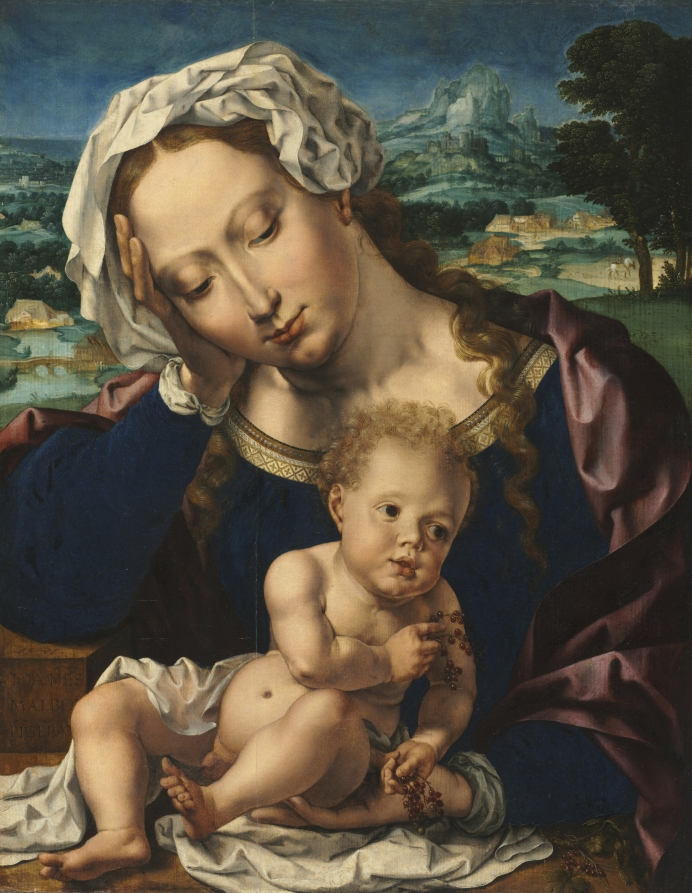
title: Virgin and Child in a Landscape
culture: Flanders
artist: Jan Gossaert (Flemish, c. 1475/78–1532)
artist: and an Anonymous Landscape Painter (Flemish)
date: 1531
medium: oil on wood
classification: Painting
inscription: Signed lower left: "1531 / JOANES / MALBO [...] / PÏGEBAT"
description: Among the first northern European artists to study in Rome, Gossaert returned north to serve in various German and Flemish courts, incorporating Italian Renaissance ideas. Gossaert also painted the frame, including the Latin inscription: "Mother, may your contemplation be our reconciliation." The patron is likely Mencía de Mendoza, a Spanish noblewoman, one of the most important art collectors and intellectuals of the early 1500s.